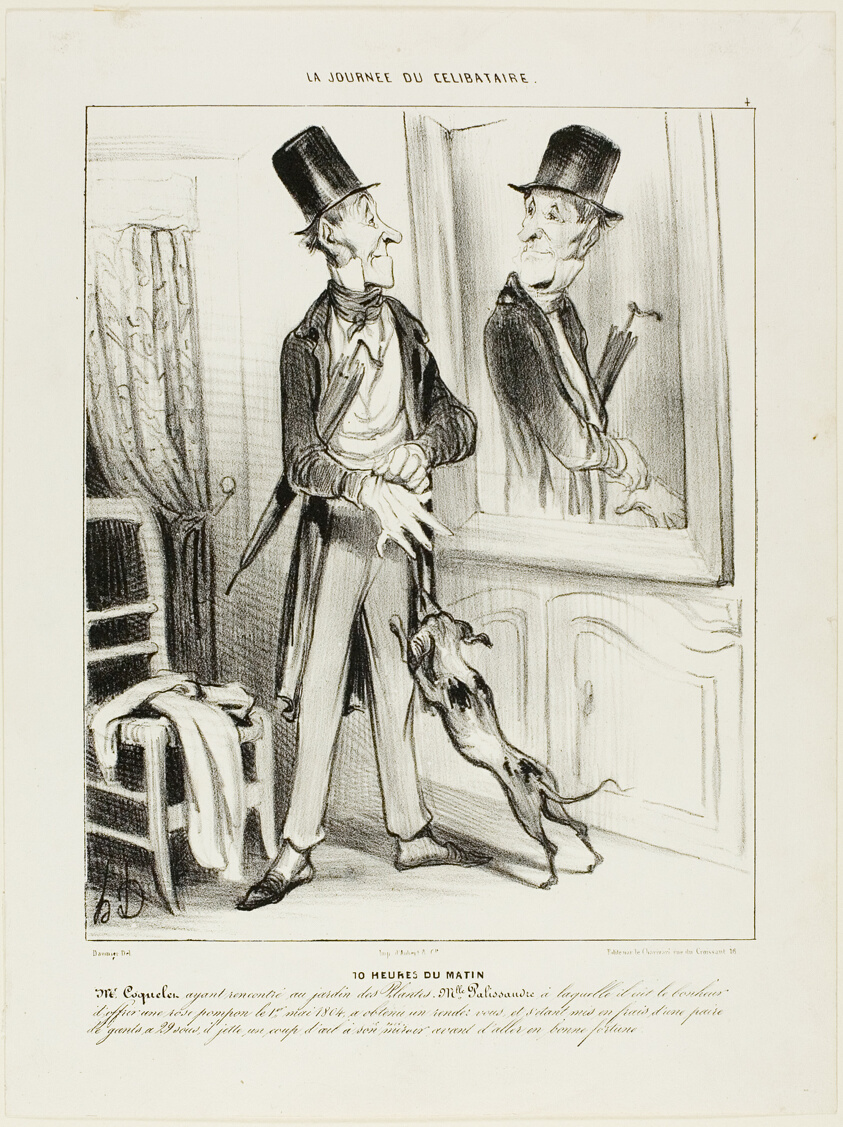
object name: Print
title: 10 O'clock in the Morning. “Monsieur Coquelet having accidentally met Miss Palissandre in the Botanical Garden, to whom he had the good fortune to offer a fairy rose the first of May 1804, had obtained a first date. After having gone to great expense buying a new pair of gloves at 29 Sous, he throws a glance at the mirror before going out to try his good fortune,” plate 4 from La Journé Du Célibataire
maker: Honoré Victorin Daumier; French, 1808-1879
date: 1839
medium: Lithograph in black on white wove paper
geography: France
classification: lithograph; print; prints and drawing